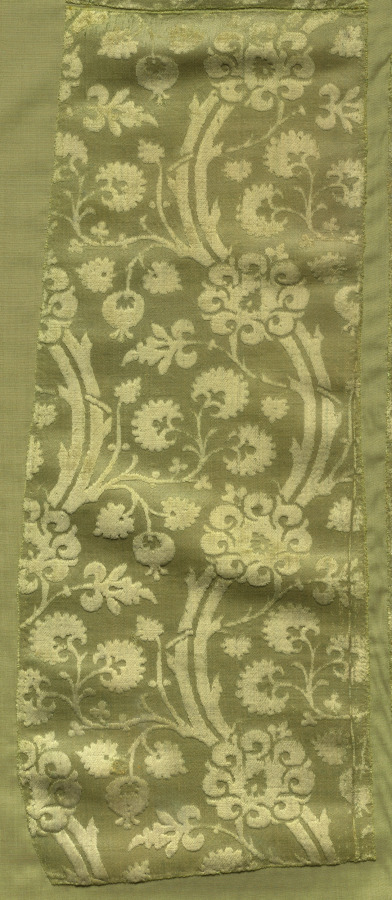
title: Fragment of a Chasuble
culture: Italy, beginning of the 15th century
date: 1400–1420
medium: velvet (cut and voided); silk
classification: Velvet